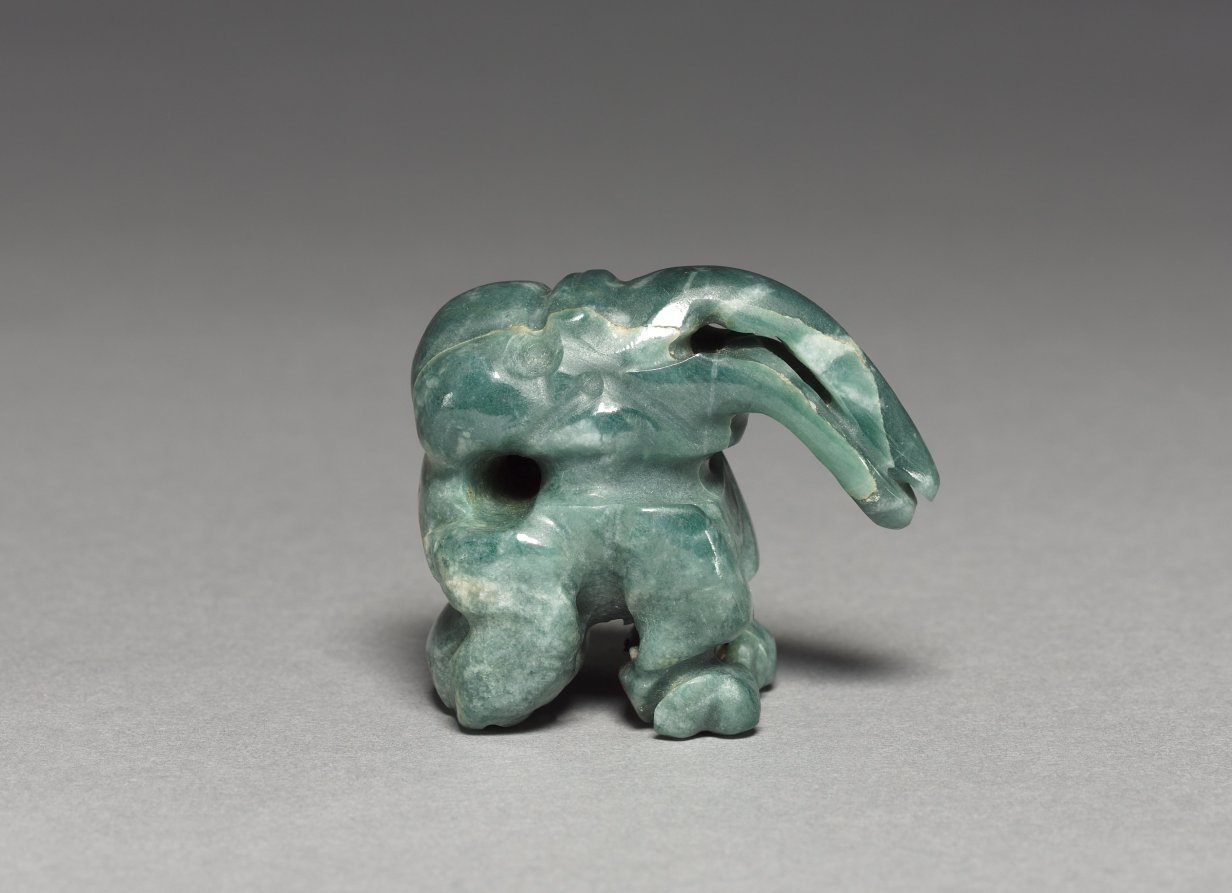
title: Bird Pendant (Buzzard or Vulture?)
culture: Costa Rica, Atlantic Watershed region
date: c. 300 BCE–600 CE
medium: jadeite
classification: Jewelry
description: Before about AD 500, when gold-working technologies were adopted in Costa Rica, jade was the quintessential luxury material and it was masterfully carved into exquisite ornaments of many kinds. Ancient Americans did not use many metal tools, and artists carved jade, a tough stone, with implements of stone, bone, bamboo, or reed.